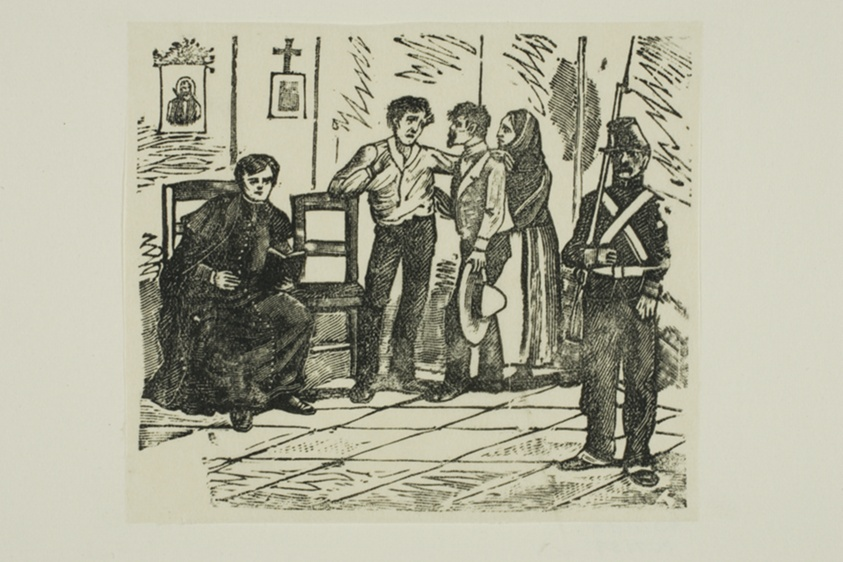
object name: Print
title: Corrido:The Death Room of a Sentenced Man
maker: José Guadalupe Posada (Mexican, 1852-1913)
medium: Relief engraving on typemetal on paper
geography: Mexico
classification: relief etching; print; prints and drawing